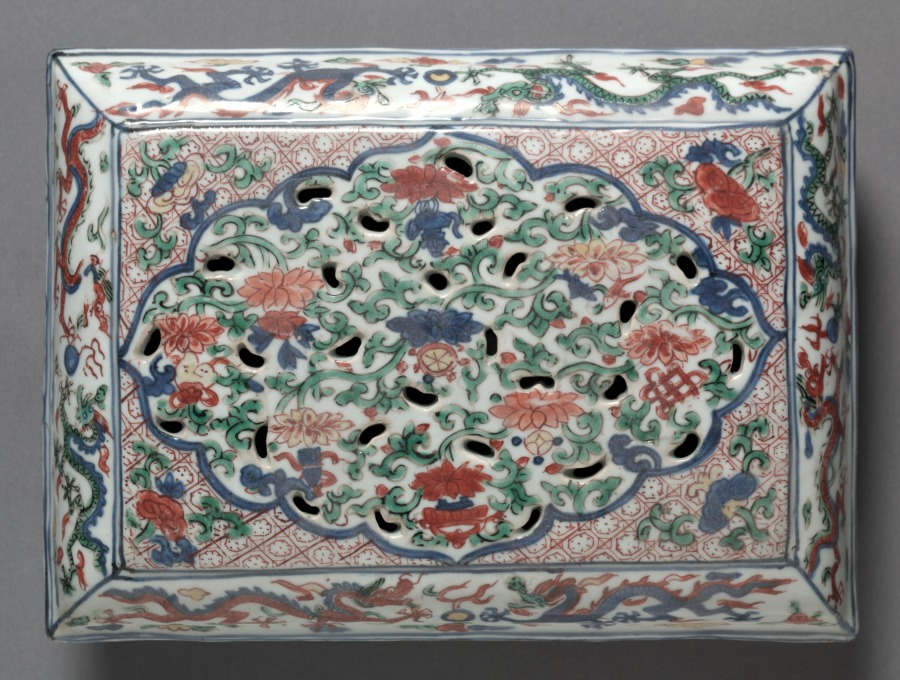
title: Box with Cover (lid)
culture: China, Jiangxi province, Jingdezhen kilns, Ming dynasty (1368-1644), Wanli reign (1572-1620)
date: 1573–1620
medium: porcelain with wucai (five color) overglaze enamel decoration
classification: Ceramic